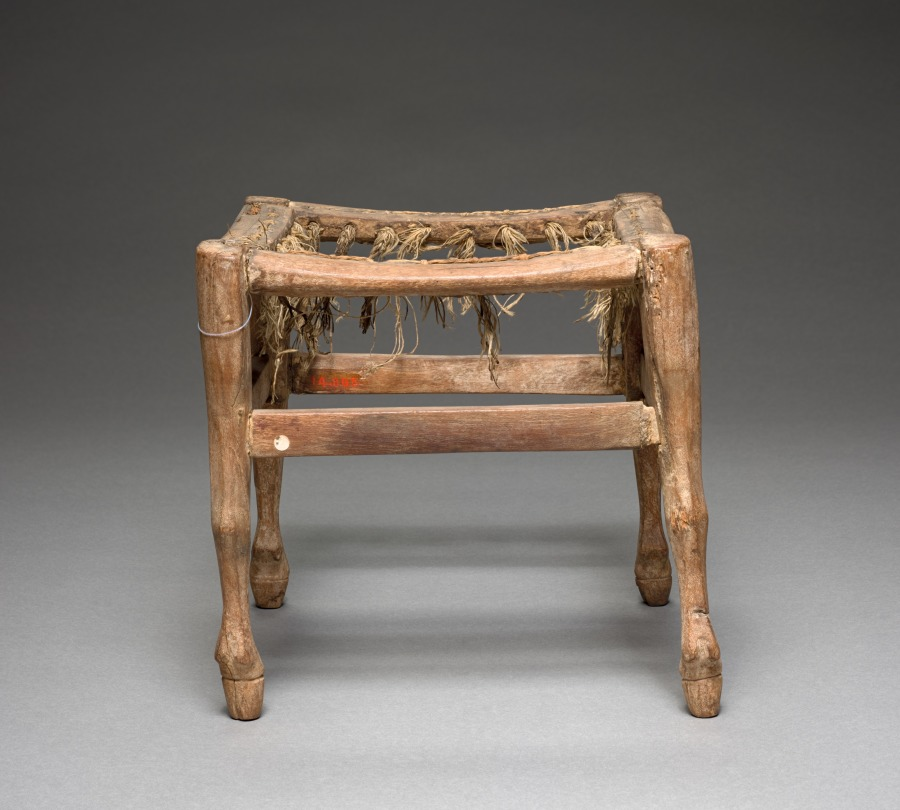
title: Child's Stool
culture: Egypt, New Kingdom (1540–1069 BCE), Dynasty 19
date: 1295–1188 BCE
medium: wood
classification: Funerary Equipment